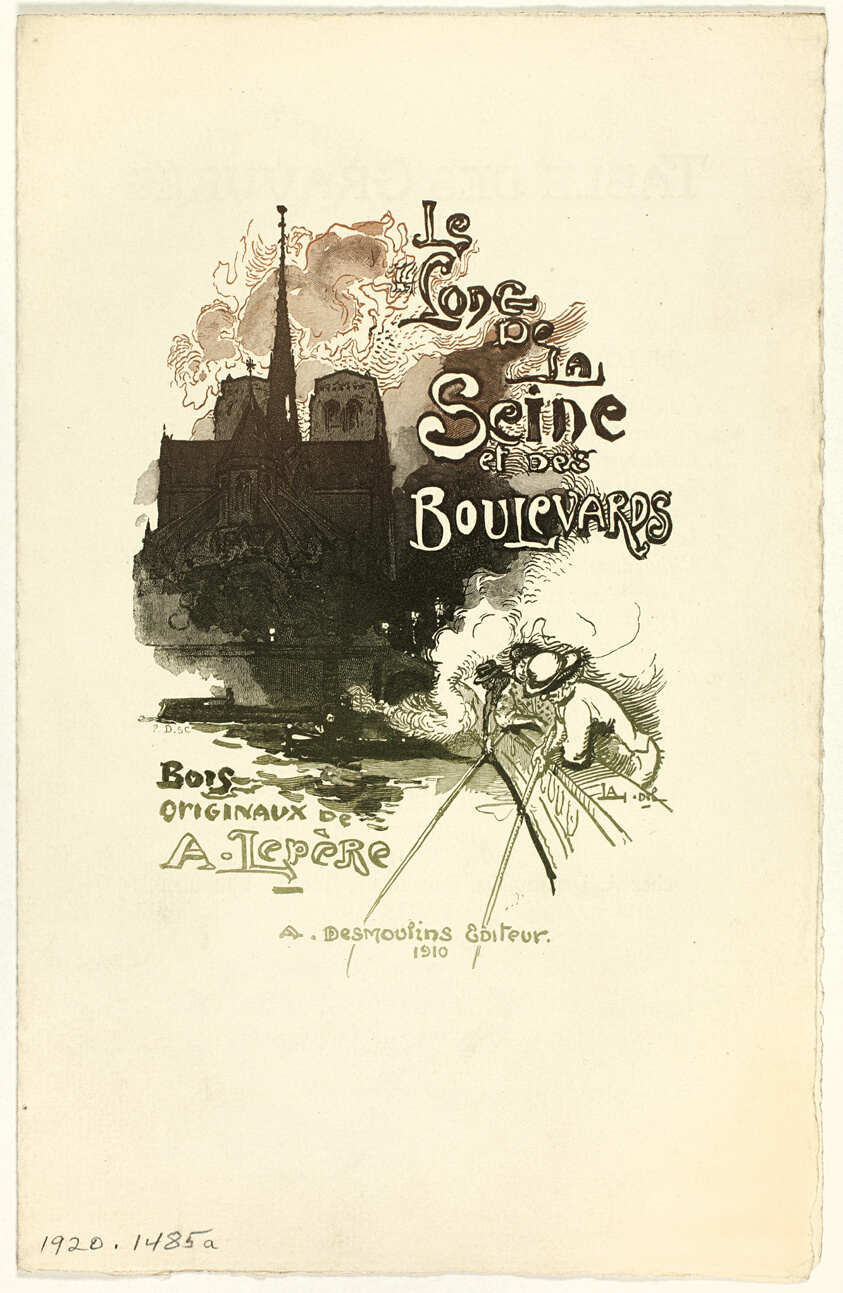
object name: Print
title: Prospectus for Le Long de la Seine et des Boulevards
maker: Pierre Desmoulins (French, active c. 1910); after Louis Auguste Lepère (French, 1849-1918); published by A. Desmoulins (French, active c. 1908-1910)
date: 1910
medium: Wood engraving in olive, black and brown on the front, wood engravings with text on both interior pages and the back cover in black, green, ochre and blue on cream wove paper with deckled bottom margin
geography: France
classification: wood engraving; print; prints and drawing